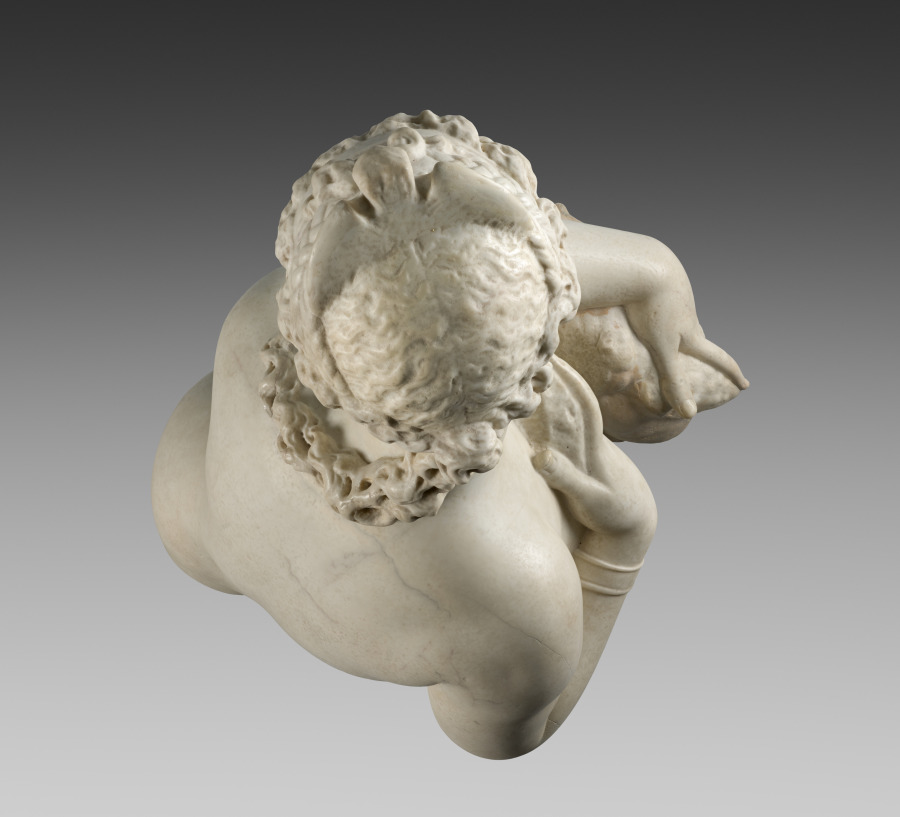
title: Fata Morgana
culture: Italy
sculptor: Giambologna (Flemish, active Italy, 1529–1608)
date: c. 1572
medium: Marble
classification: Sculpture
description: Commissioned by prominent banker Bernardo Vecchietti, whose surname means “old,” Fata Morgana took the name both of the nearby spring that fed the fountain she surmounted, and the legendary fairy who restored King Arthur’s youth. The Fata Morgana is one of only around a dozen sculptures in marble by Giambologna. The artist’s favorite subject was the female nude because of its capacity to showcase his extraordinary ability to model softness in hard stone and to convey dynamic movement. Her twisting pose invites the viewer to appreciate the Fata Morgana from every angle.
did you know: The sculpture originally appeared to emerge mysteriously from a cave within a constructed grotto.